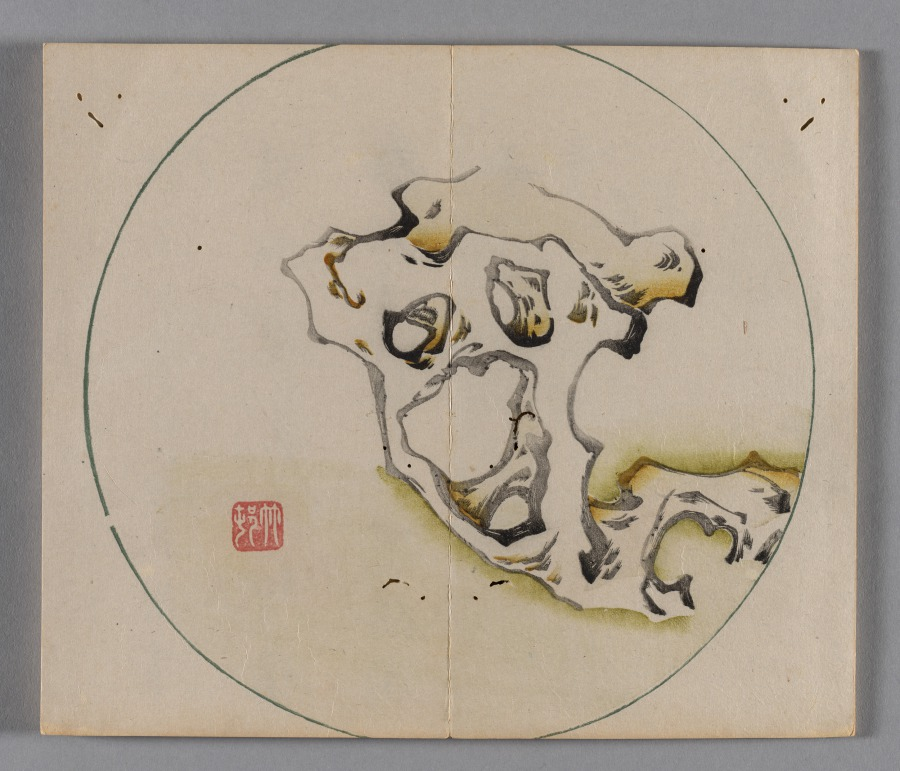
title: Ten Bamboo Studio Painting and Calligraphy Handbook (Shizhuzhai shuhua pu): Round Fans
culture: China, Qing dynasty (1644-1911)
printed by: Hu Zhengyan (Chinese, c. 1584–1674)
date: 1633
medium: Woodblock-printed book; ink and colors on paper; first edition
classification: Print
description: Color printing reached a level of perfection in the early 1600s, as seen in this Ten Bamboo Studio Collection of Calligraphy and Painting and the Mustard Seed Garden Manual of Painting (printed 1679 and 1701). The painterly quality, precision in registering (aligning) the woodblocks, and harmonious colors made them the most successful color print editions in Chinese history. Both editions were printed and compiled in Nanjing, spread nationwide, and had a great impact on the arts in Japan and Korea.